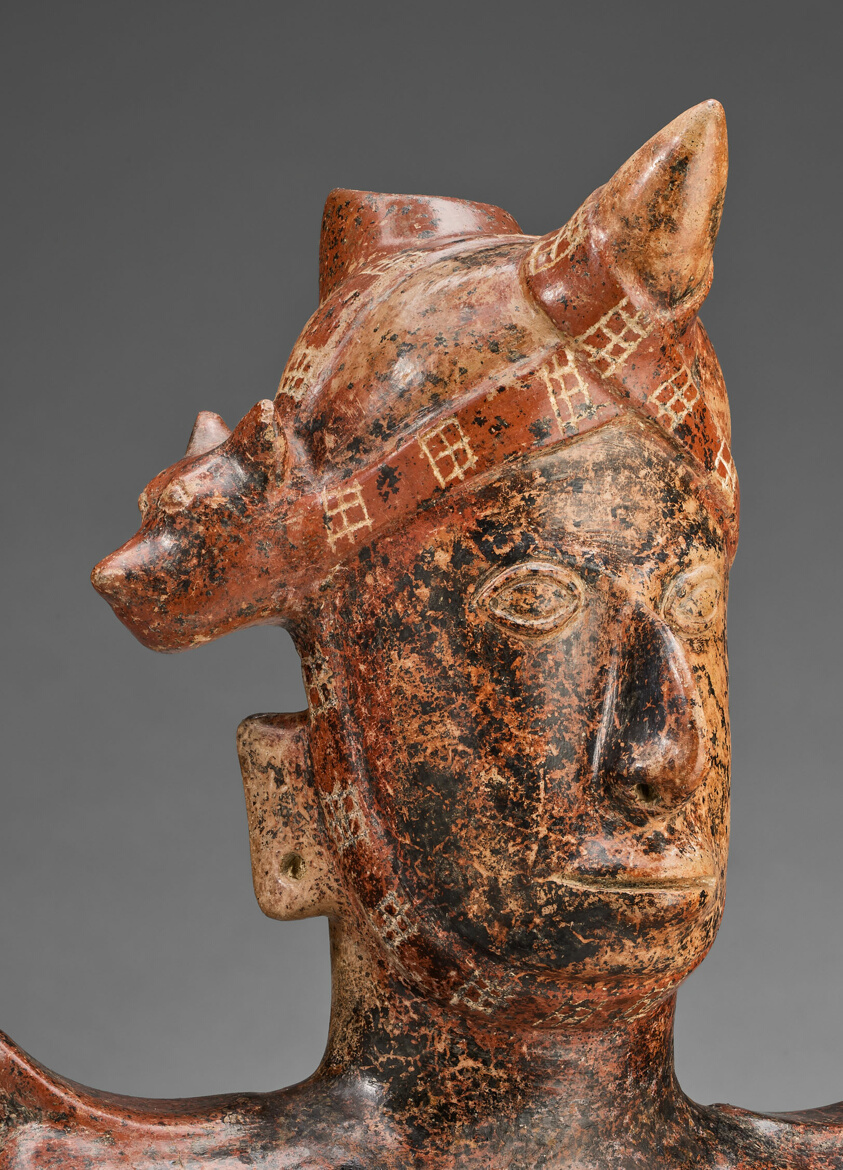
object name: Sculpture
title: Figure of a Seated Chieftain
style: colima, mesoamerican, Pre-Columbian, americas, west mexico, Arts of the Americas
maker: Colima (Colima, Mexico)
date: 100 BCE–250 CE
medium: Ceramic and pigment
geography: Colima state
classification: earthenware; art of the americas; ceramics; sculpture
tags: people, headdresses, rulers (people), rulership